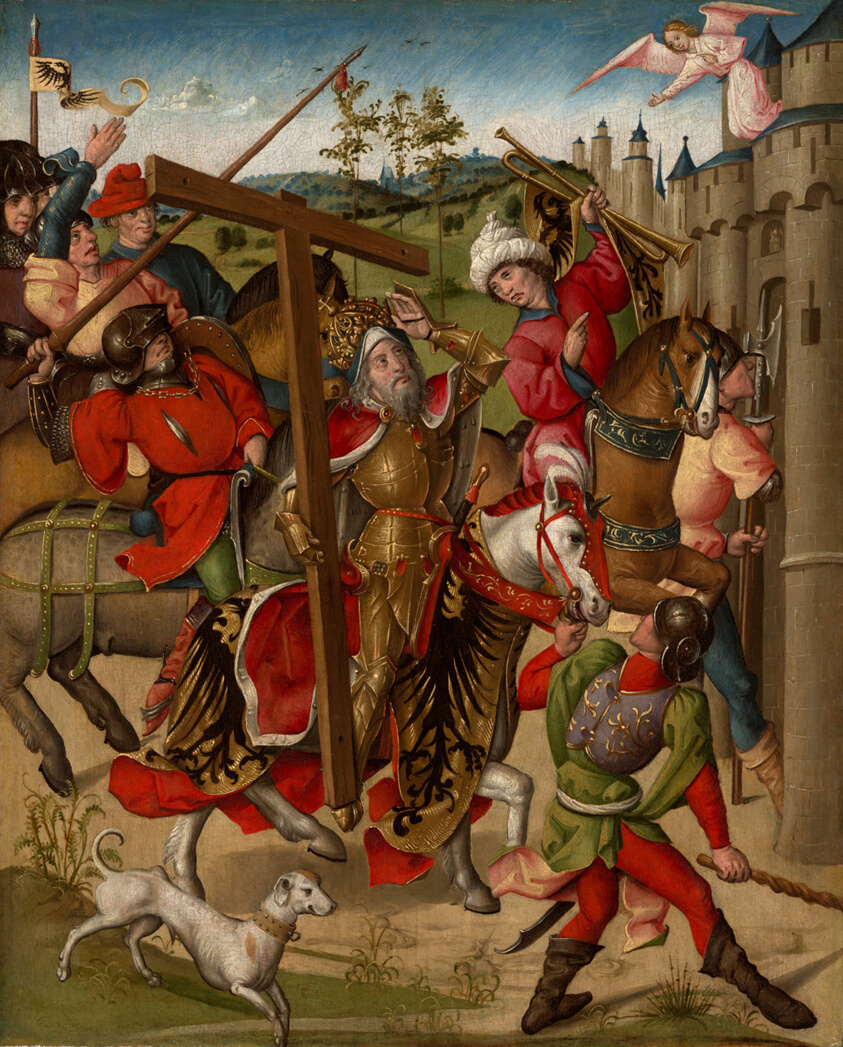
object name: Painting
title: Emperor Heraclius Denied Entry into Jerusalem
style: 15th century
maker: Netherlandish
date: c. 1470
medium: Tempera and oil on panel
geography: Netherlands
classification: painting; paint; tempera; oil on panel; oil paintings (visual works); european painting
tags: king, angels, cross, dog, eagles, figure, gates, heraldry, horse, horses, landscape, man, men, nobility, shields, soldiers, spears, wall